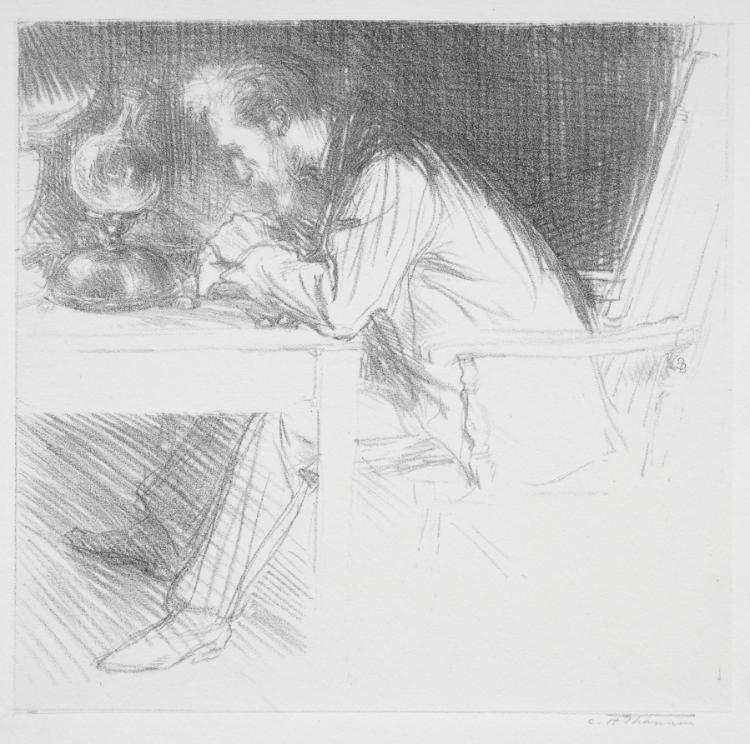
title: Charles Ricketts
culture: England, 19th century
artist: Charles Hasslewood Shannon (British, 1863–1937)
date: 1894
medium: lithograph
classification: Print